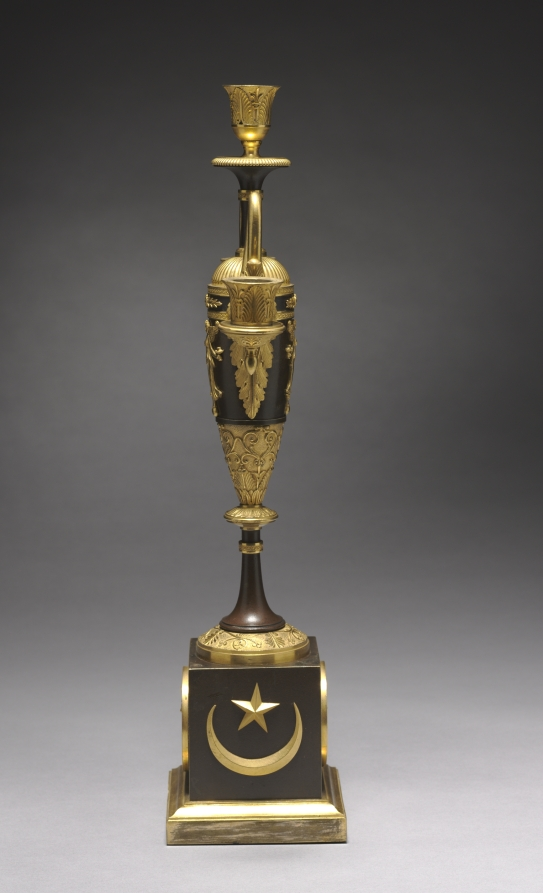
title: Candelabrum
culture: France, late 18th-early 19th century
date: c. 1800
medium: gilt and patinated metal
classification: Furniture and woodwork